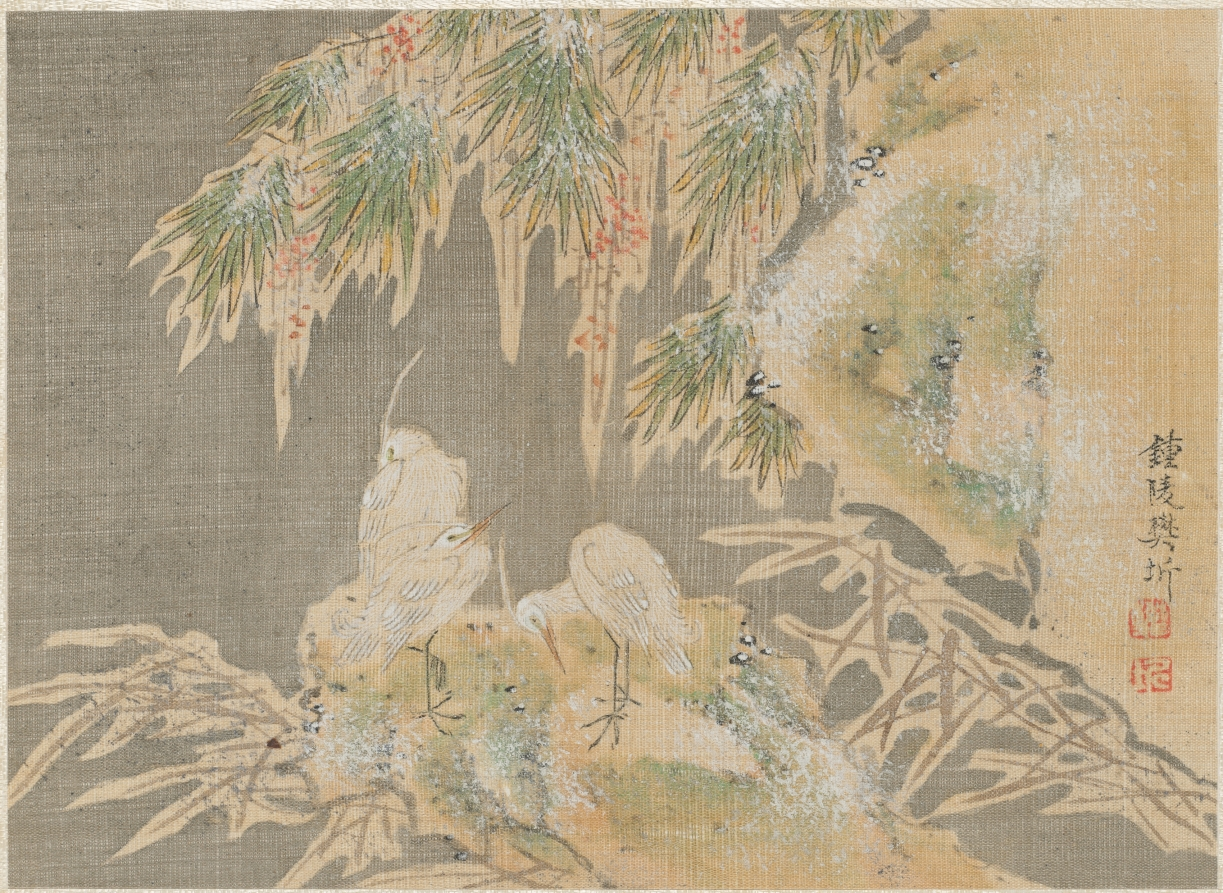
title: Album of Miscellaneous Subjects, Leaf 10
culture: China, Qing dynasty (1644-1911)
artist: Fan Qi (Chinese, 1616–after 1694)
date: early 1650s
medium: album leaf, ink and color on silk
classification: Painting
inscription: Artist's signature: Zhongling Fan Qi 鐘陵樊圻 ["Fan Qi of Zhongling" (Zhongling is another name for Nanjing.)]. Artist's seals: Fan Qi 樊圻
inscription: Poem by Zhou Yi 周儀 (mid 17th century–about 1705): Green bamboo stand alone with a snowy covering,/ In the deep recesses of a secluded valley, the evening breeze is light./ White egrets are lean as shadows with the cold ripples frozen,/ They enter the gorge not just to admire the fish.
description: Leaf 10 Zhou Yi's colophon reads: Green bamboos stand alone with a snowy covering, In the deep recesses of a secluded valley, the evening breeze is light. White egrets are lean as shadows with the cold ripples frozen, They enter the gorge not just to admire the fish.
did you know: Icicles encase the leaves and red berries of the Nandina domestica (Heavenly Bamboo).